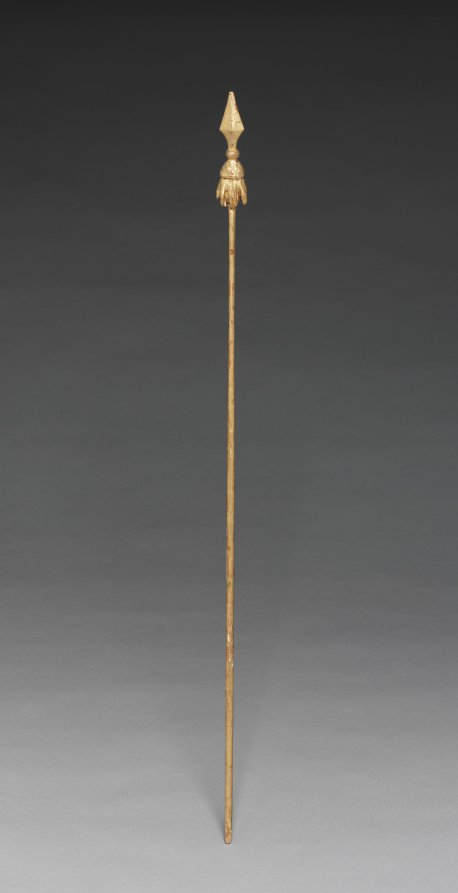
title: Altarpiece with Relics - Lance, lower right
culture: Germany, Bavaria, 18th century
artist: Joseph Matthias Götz (German, 1696–1760)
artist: and Workshop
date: c. 1735–1740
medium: gilded wood, with relics in niches: gilded wood, mother-of-pearl, ebony, red silk, gold wire, seed pearls, rock crystal, pen and ink on paper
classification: Sculpture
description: Götz covers every surface in gold leaf, giving each part of the object equal importance, rather than simply framing a central picture. In this distinctively Central European approach, figural narrative is subordinate to the overall ensemble. Götz designed this object to rest on top of an altar, probably in front of a larger painted or sculpted decorative scheme. The work contains relics seen through the small windows on the perimeter. These small remains of holy figures demonstrate the persistence of a medieval Catholic tradition well into the 1700s.